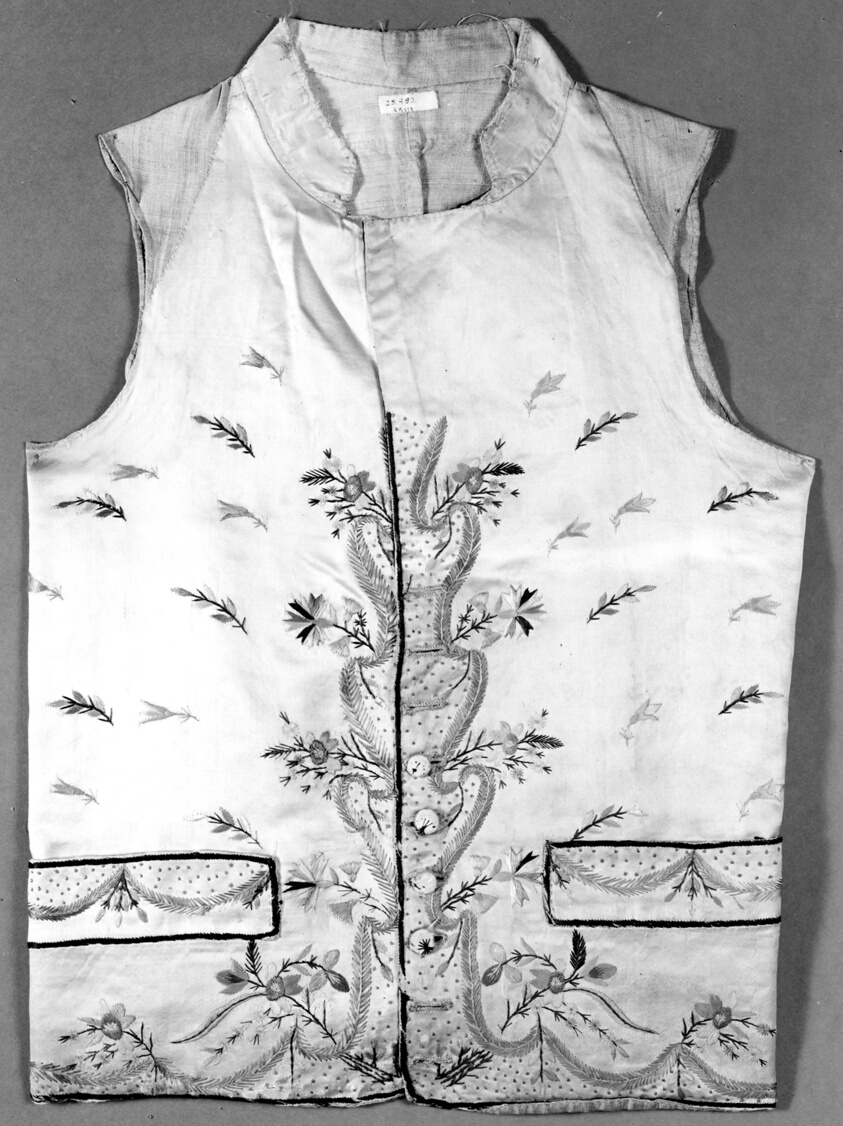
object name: Costume and Accessories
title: Waistcoat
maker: England or France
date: 1750/1800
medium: Silk, satin weave; embroidered with silk floss in satin, long and short, stem, straight, star, outline and fishbone stitches; with slanting satin stitch on border; French knots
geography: England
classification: textile; costume; needlework (visual works); dress (garment); clothing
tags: fashion